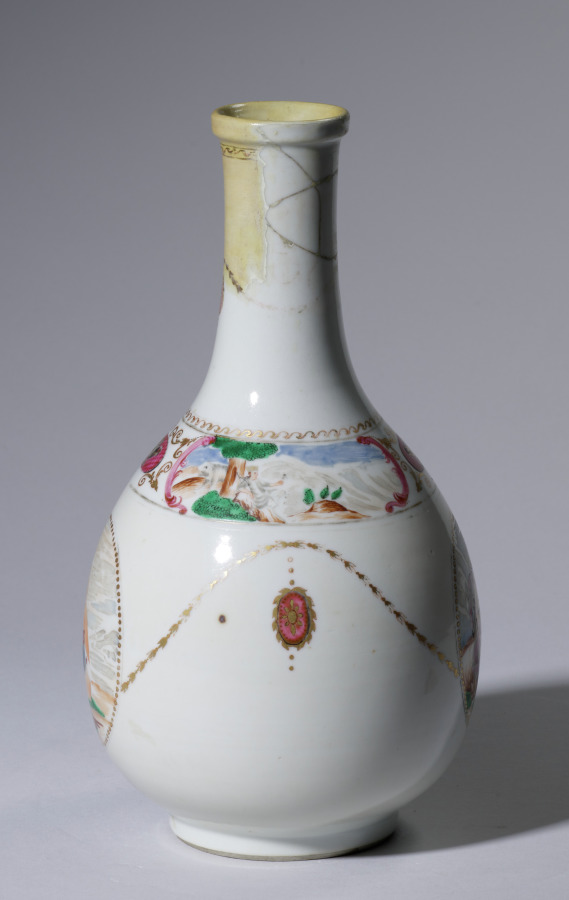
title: Bottle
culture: China, Chinese Export, early 19th century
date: c. 1800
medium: porcelain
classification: Ceramic